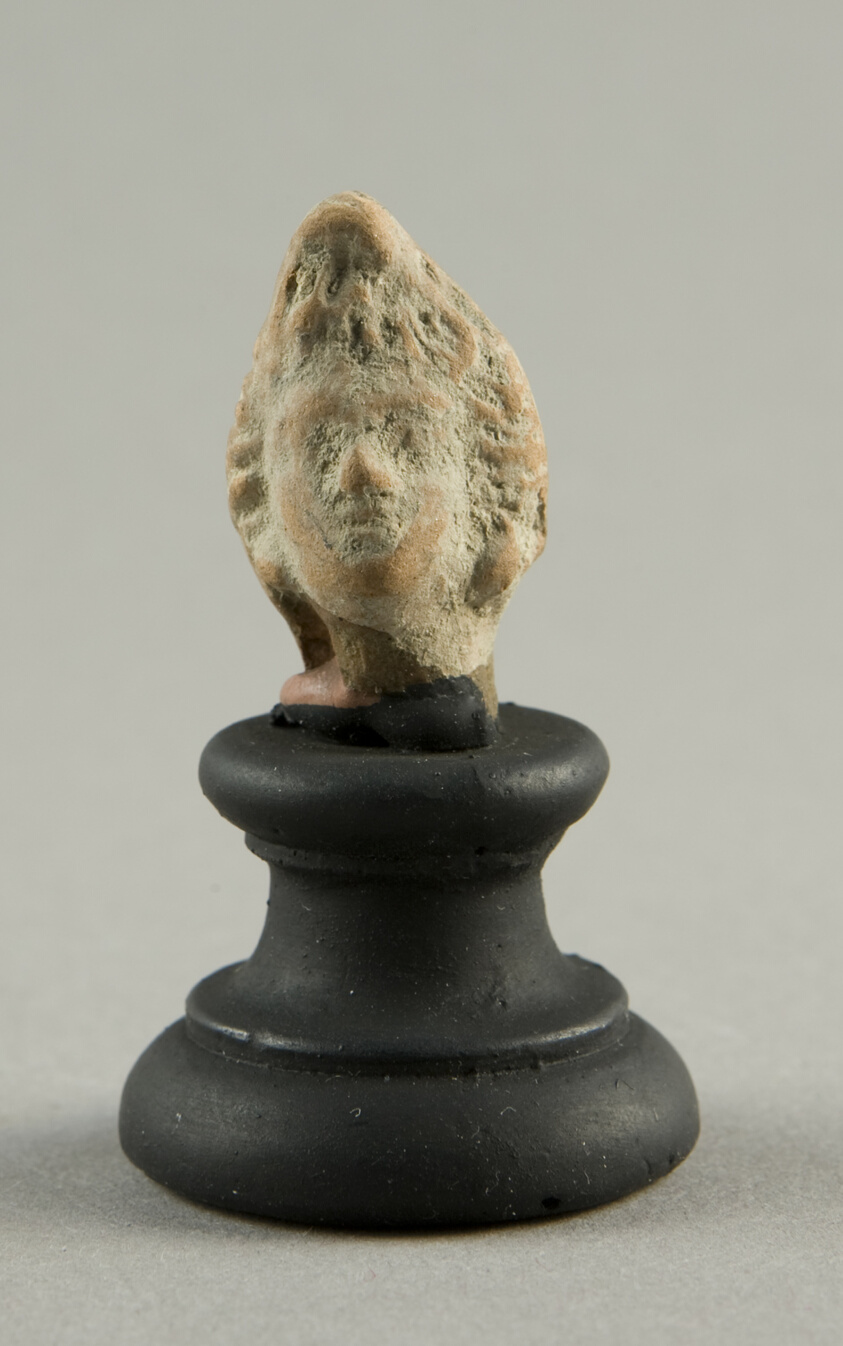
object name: Sculpture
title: Head of a Woman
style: greek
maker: Greek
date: 4th-3rd century BCE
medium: terracotta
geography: Greece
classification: earthenware; ceramics; sculpture; ancient art